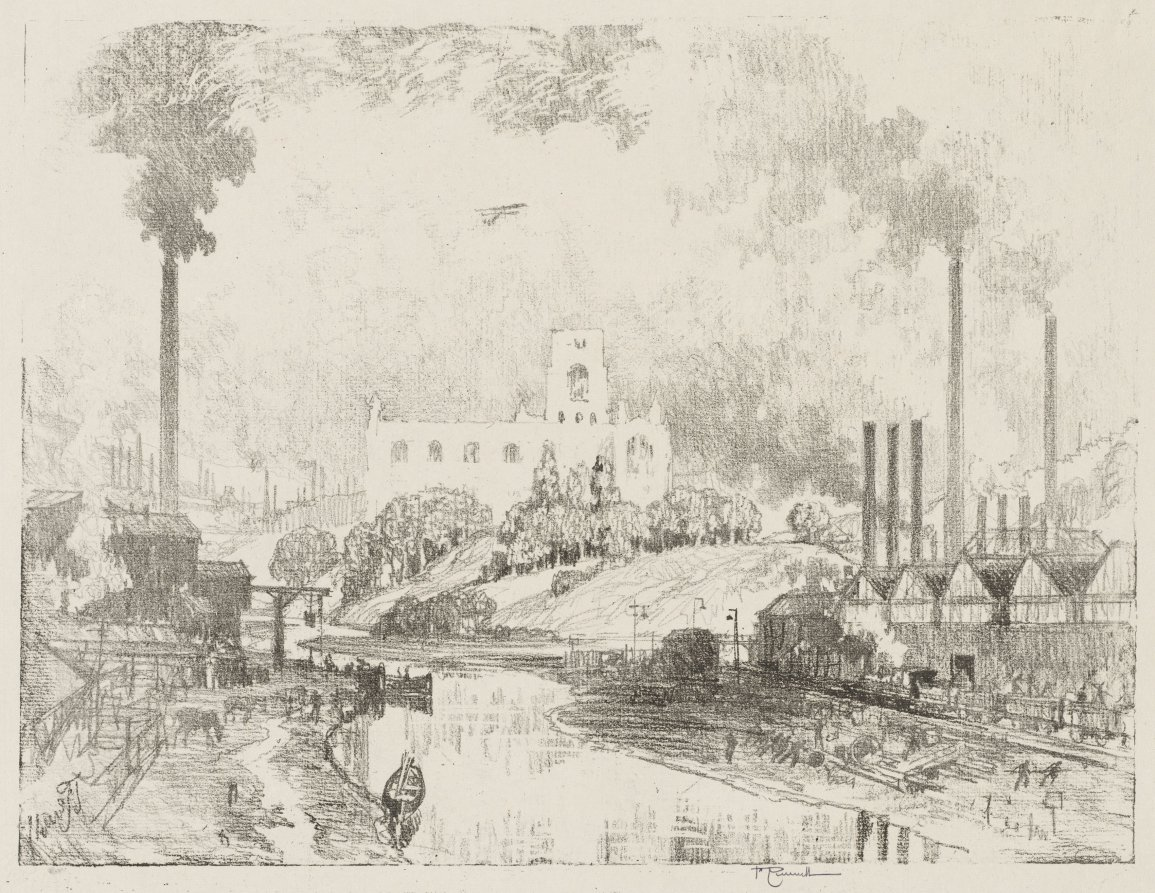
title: English War Work: Peace and War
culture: America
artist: Joseph Pennell (American, 1857–1926)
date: 1916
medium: lithograph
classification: Print